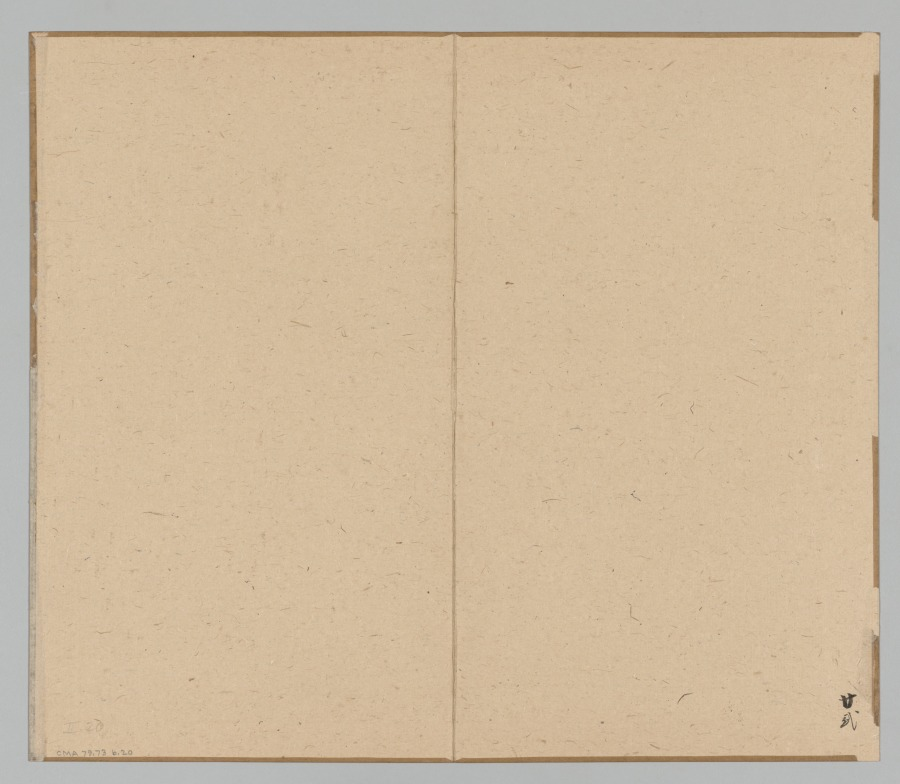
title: Reverberations of Taiga, Volume 2 (leaf 20)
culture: Japan, Edo period (1615–1868)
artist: Aoki Shukuya (Japanese, d. 1802)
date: mid- to late 1700s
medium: double-leaf from a pair of albums; ink and light color on paper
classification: Portfolio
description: Traditionally, young painters in Japan began their studies with an established master-painter. The master's compositions invariably became models that the apprentice copied to learn various ink and brush techniques. Shukuya was a pupil of the famous Kyoto artist Ikeno Taiga, whose style is reflected in these sketches of rocks, trees, and mountains.